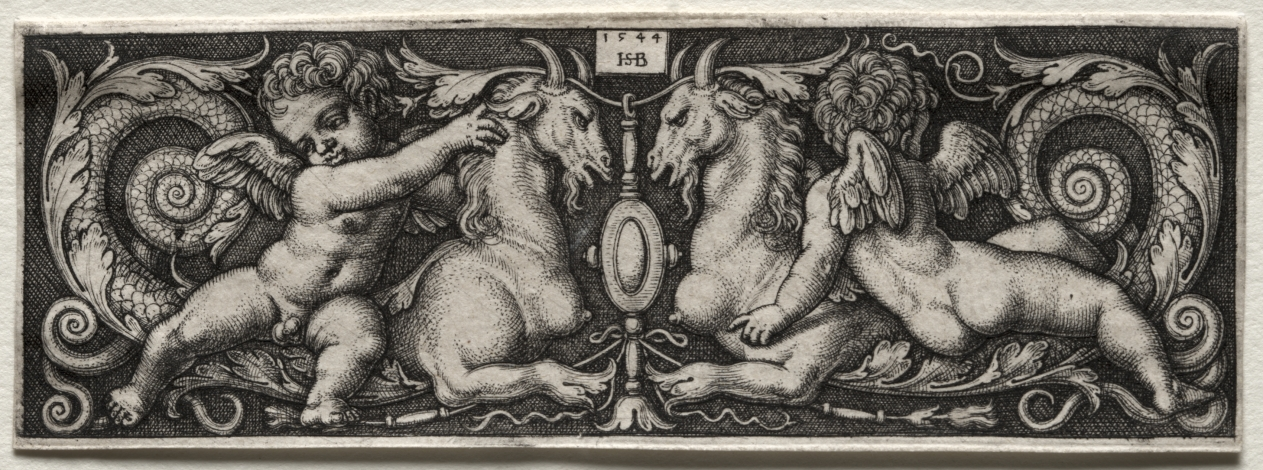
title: Two Genii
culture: Germany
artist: Hans Sebald Beham (German, 1500–1550)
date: 1544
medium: engraving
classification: Print